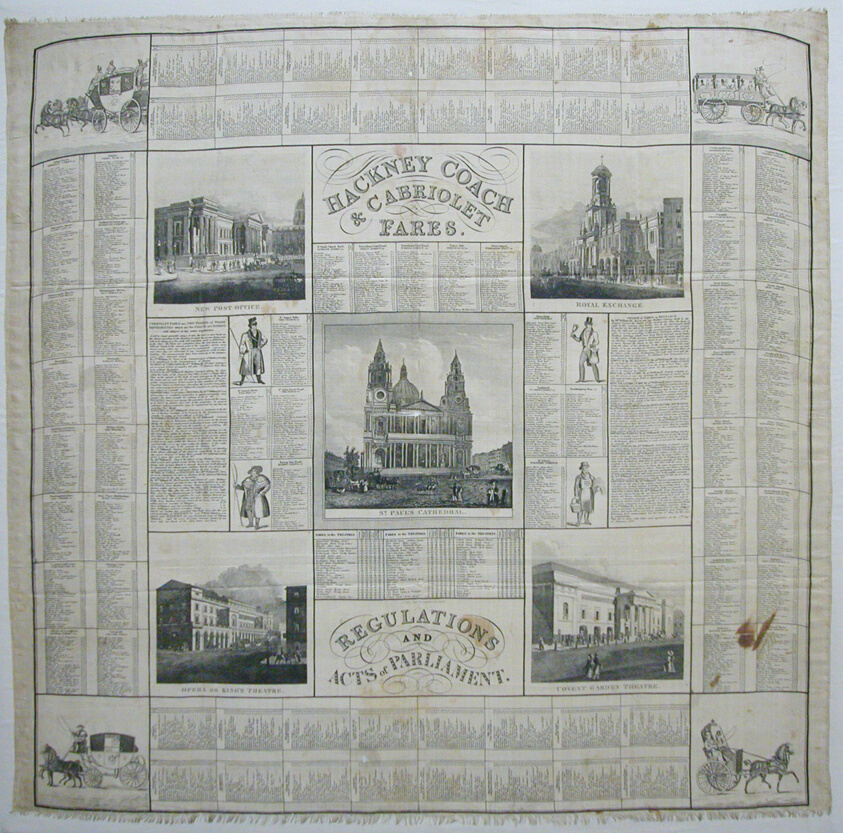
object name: Textile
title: Hackney Coach and Cabriolet Fares/ Regulations and Acts of Parliament (Handkerchief)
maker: Designed by John Leander Bishop (English, 1810–1868); England, London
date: 1832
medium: Silk, plain weave; copperplate printed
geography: London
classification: textile; weaving - printed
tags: propaganda